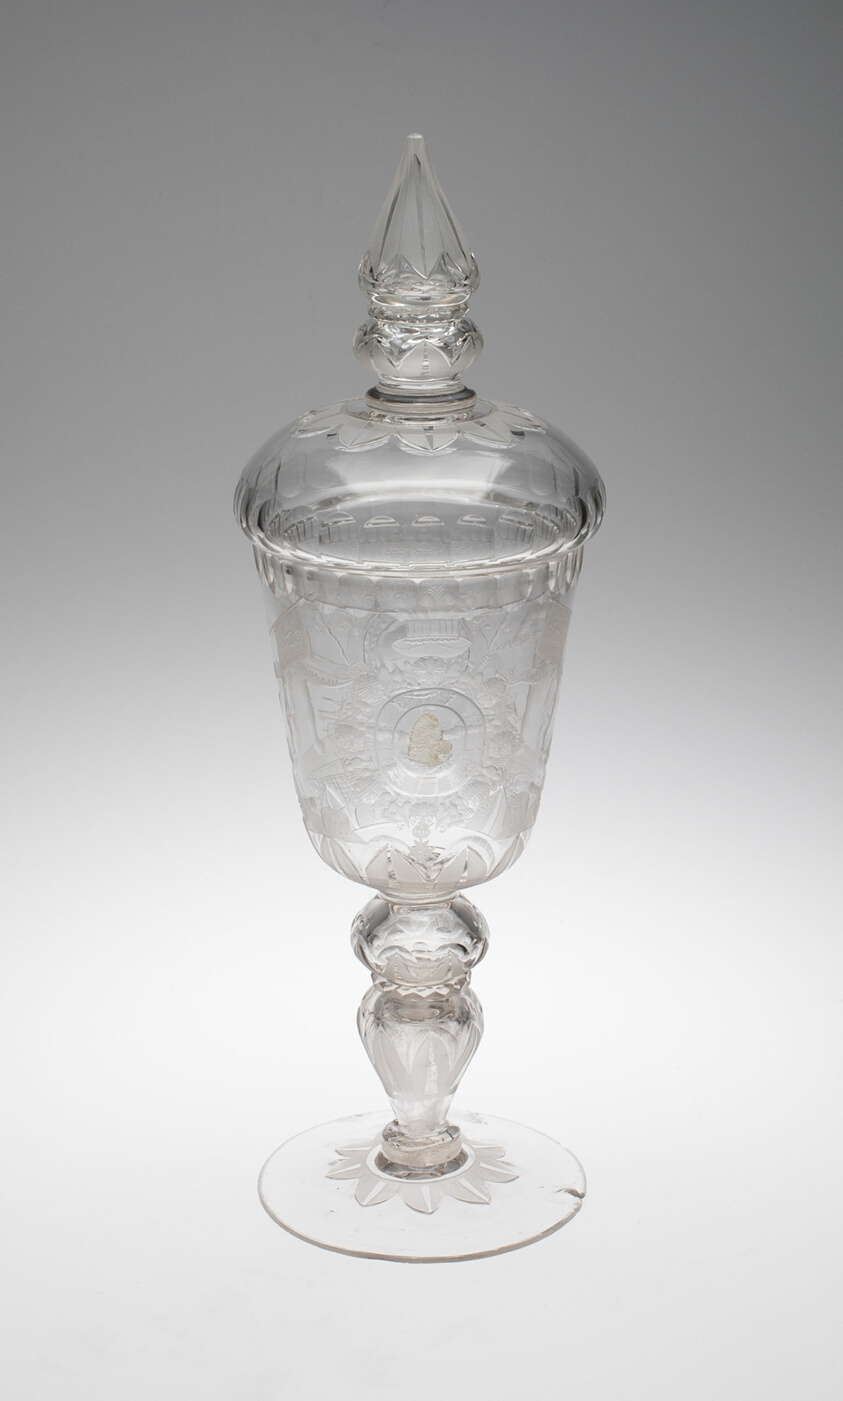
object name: Glass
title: Covered Goblet (Pokal)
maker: Germany, Potsdam or Berlin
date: 1713/20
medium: Blown and molded glass with engraving and applied medallion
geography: Germany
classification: drinking vessel; glass; european decorative arts